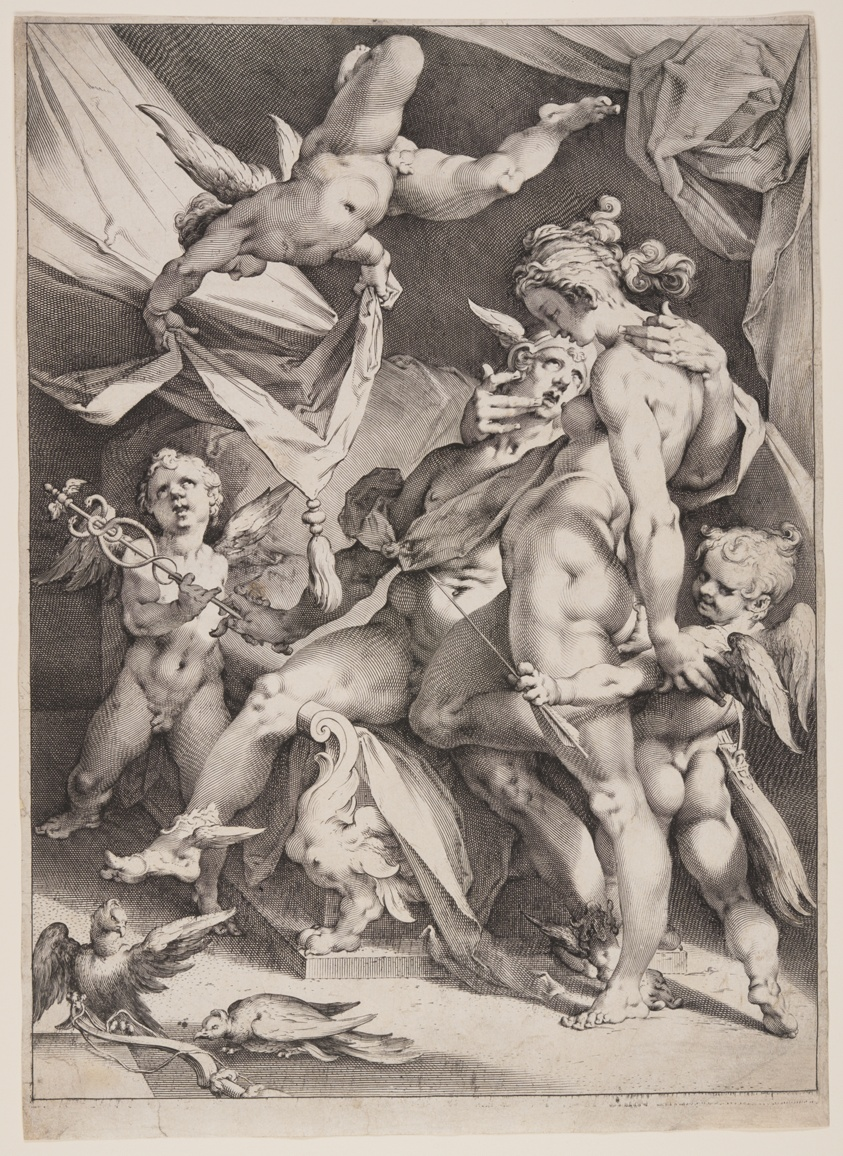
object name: Print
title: Venus and Mercury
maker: Jan Harmensz Muller (Dutch, 1571–1628); after Bartholomeus Spranger (Flemish, 1546–1611)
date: c. 1600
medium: Engraving on ivory laid paper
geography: Netherlands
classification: print; paper; prints and drawing; engraving